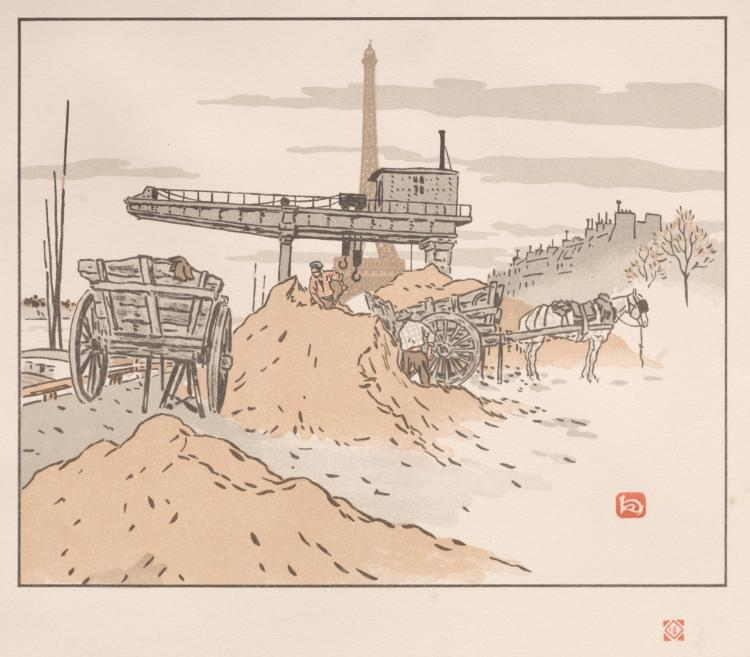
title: Thirty-Six Views of the Eiffel Tower: From the Quai de Grenelle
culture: France, early 20th century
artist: Henri Rivière (French, 1864–1951)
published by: Printed by Verneau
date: 1902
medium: color lithograph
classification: Print